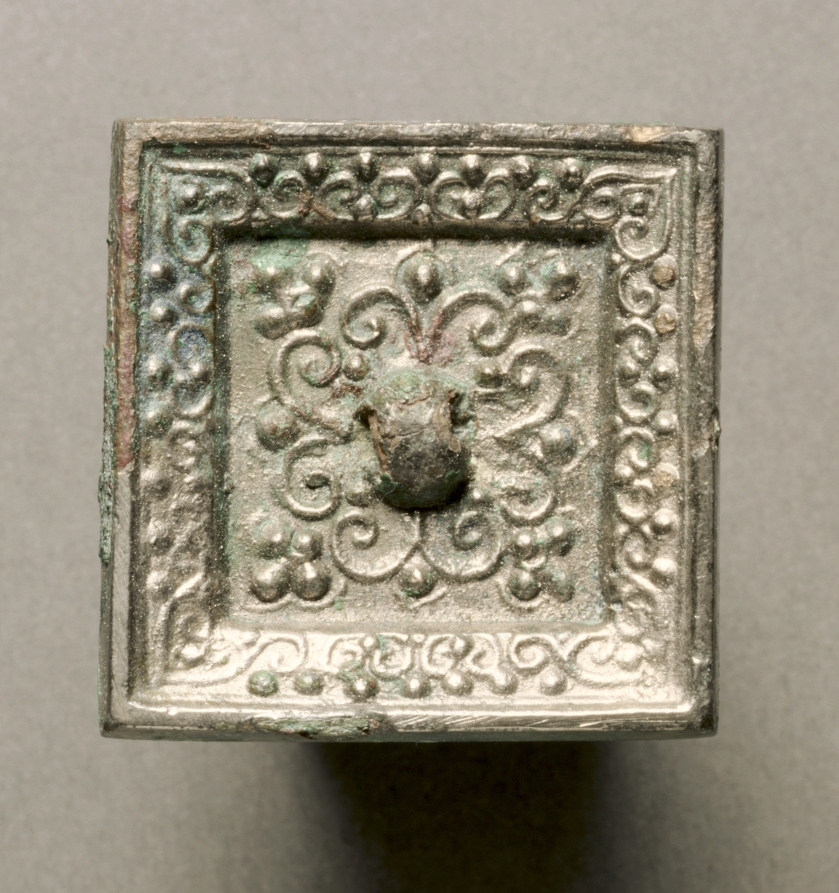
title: Miniature Square Mirror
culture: China, Sui dynasty (581-618)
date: 581–618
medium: bronze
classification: Metalwork